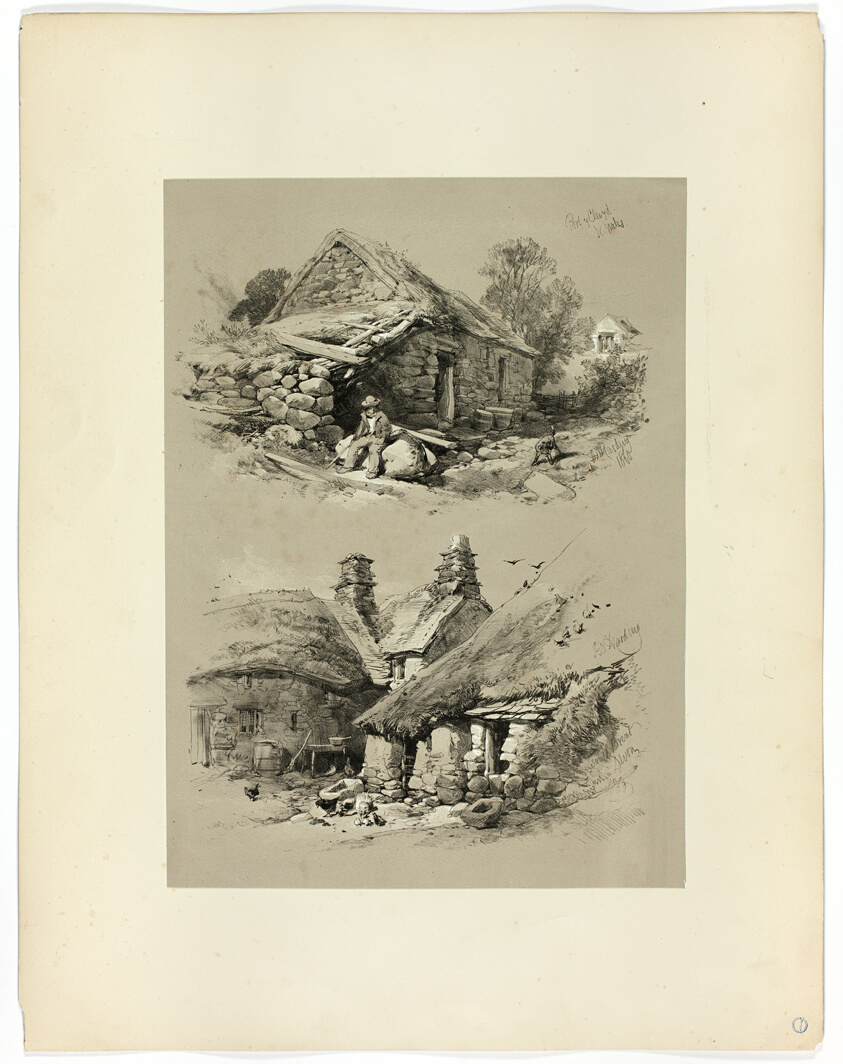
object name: Print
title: Port of Clwyd and South Brent, Devon, from Picturesque Selections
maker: James Duffield Harding, (English, 1798-1863); Published by W. Kent and Co.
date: 1860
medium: Lithograph on paper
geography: England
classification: lithograph; print; prints and drawing